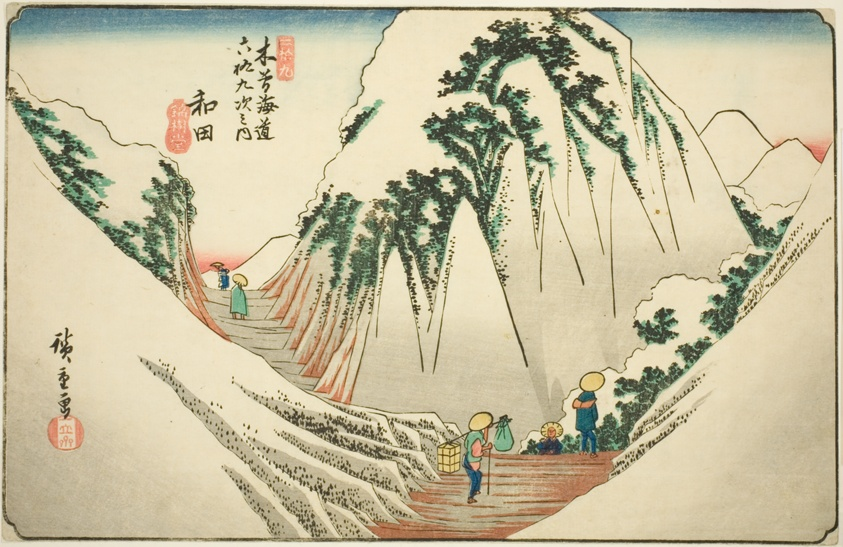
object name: Print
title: No. 29: Wada, from the series "Sixty-nine Stations of the Kisokaido (Kisokaido rokujukyu tsugi no uchi)"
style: Japanese (culture or style)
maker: Utagawa Hiroshige 歌川 広重; Japanese, 1797-1858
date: c. 1835/38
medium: Color woodblock print; oban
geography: Japan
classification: woodblock print; print; asian art